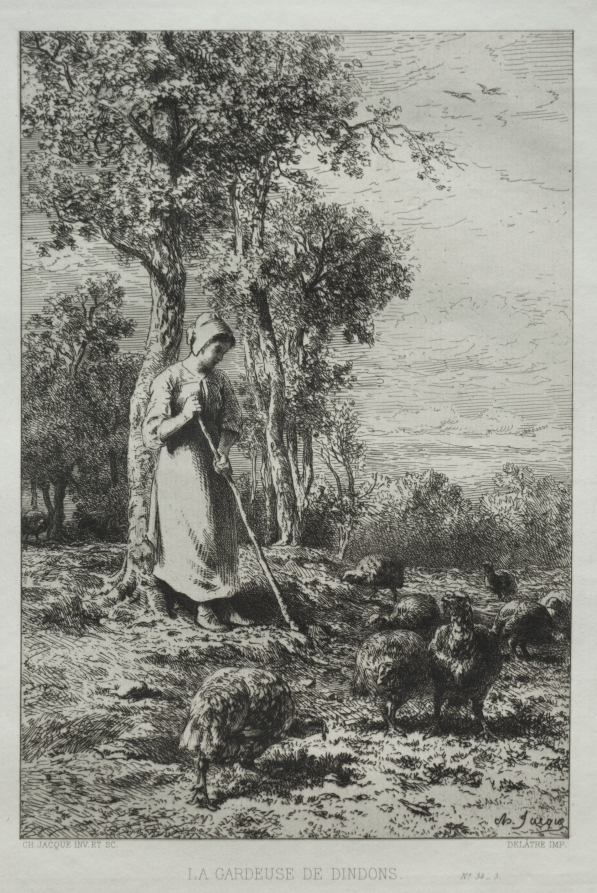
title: Keeper of the Turkeys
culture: France, 19th century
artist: Charles-Émile Jacque (French, 1813–1894)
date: 1866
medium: etching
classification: Print